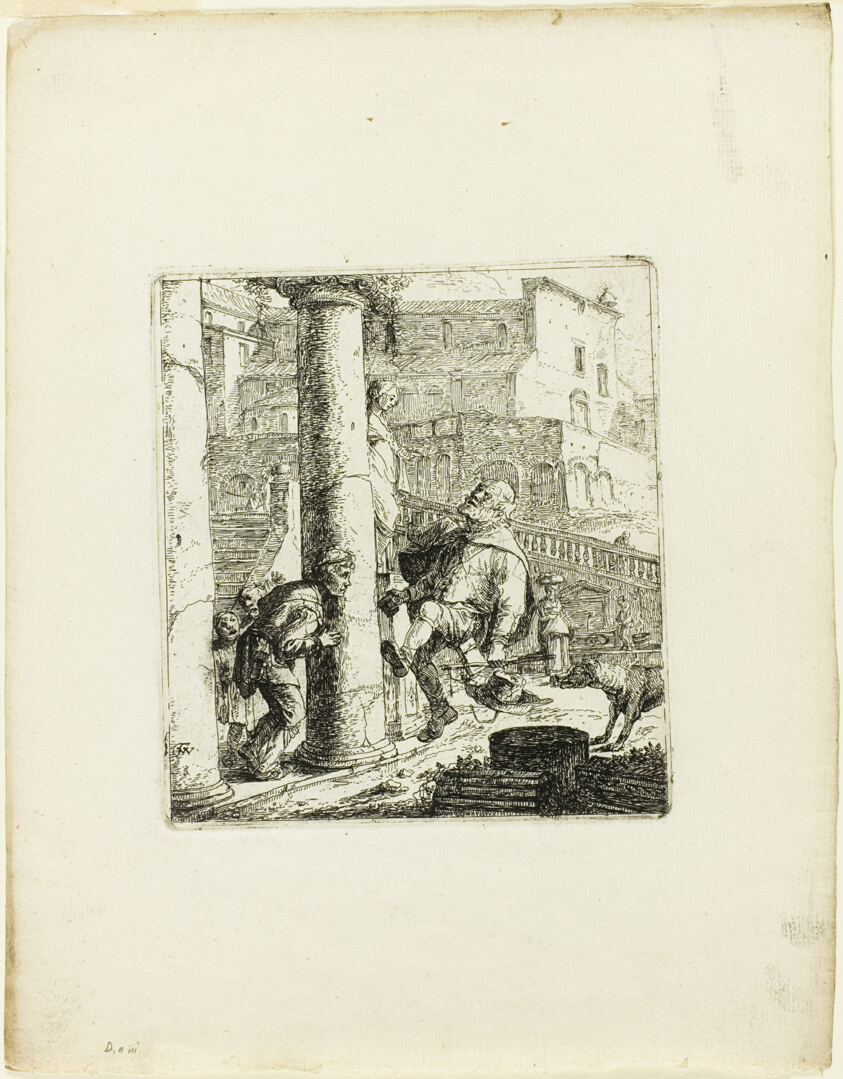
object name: Print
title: The Blind Beggar Tricked by Lazarillo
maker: Thomas Wyck (Dutch, 1616-1677)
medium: Etching on ivory laid paper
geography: Holland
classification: etching; print; prints and drawing